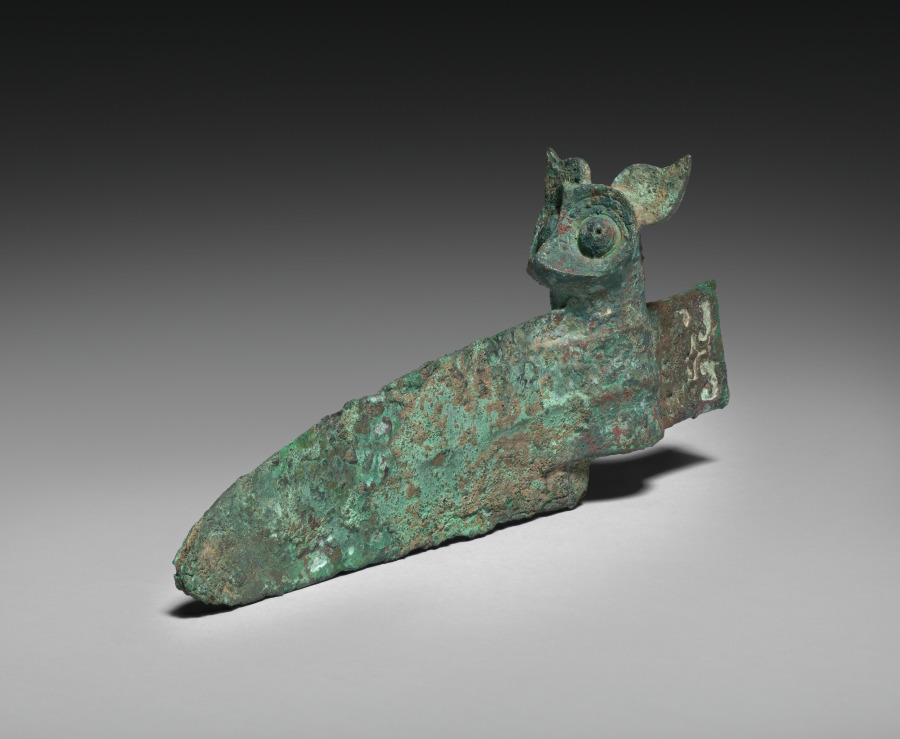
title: Axe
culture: China, Shang dynasty (c. 1600–c. 1046 BCE)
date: 1766–1045 BCE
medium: bronze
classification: Metalwork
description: The head of an owl with large eyes and ears, sitting above the blade of a halberd-axe, may have deterred evil and harm from its carrier. Whether such an axe was used in ritual or warfare is not clear.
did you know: A staff or pike would have attached to the blade via the socket below the owl's head.